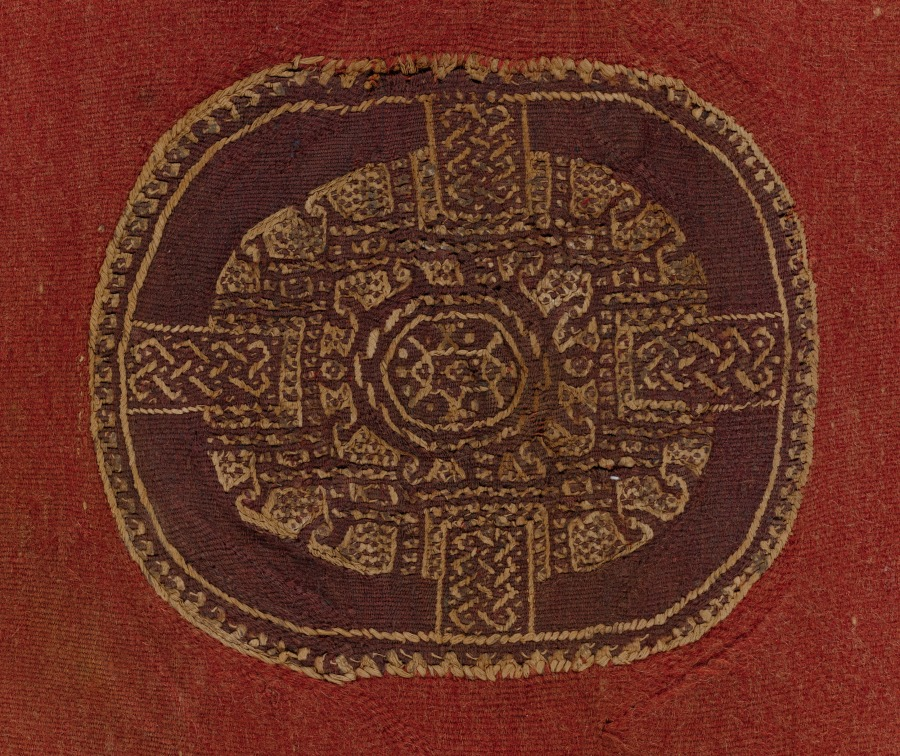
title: Luxurious Woolen Tunic with Decorated Bands and Roundels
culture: Egypt, Umayyad period (661–750)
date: 600s–700s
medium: undyed linen, dyed wool: weft-faced plain weave with slit- and dovetailed-tapestry weave, supplementary weft wrapping, embroidery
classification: Textile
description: Since the mid-200s CE tunics were the main garments worn in Egypt. This unisex tunic is decorated on the front and back with the same geometric and figural motifs, including men on horseback hunting and geometric braided knots that were believed to protect the wearer from harm. A red background was favored in the early Islamic period. Made of thick wool for cooler weather, it was woven in one complete piece with the front, back, and sleeves in this exact shape and size. The tunic’s owner repaired it on the left side and shortened it nearly two inches by sewing a fold around the waist. The discoloration and deterioration indicate the garment may have been used in a burial.